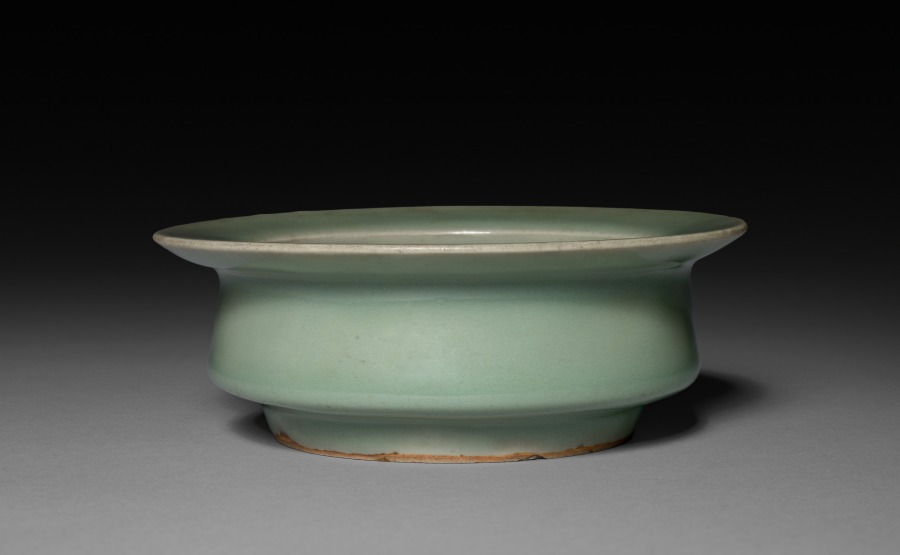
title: Brush Washer: Longquan Ware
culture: China, Southern Song dynasty (1127-1279)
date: 13th Century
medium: glazed porcelain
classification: Ceramic